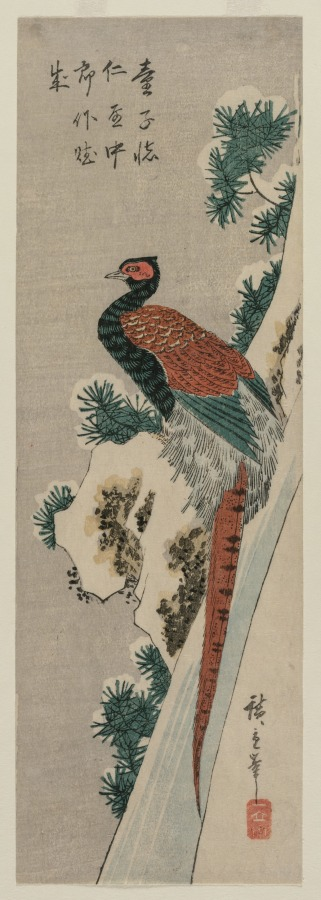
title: Copper Pheasant by Snowy Waterfall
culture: Japan, Edo period (1615–1868)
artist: Utagawa Hiroshige (Japanese, 1797–1858)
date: late 1830s or early 1840s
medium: color woodblock print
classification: Print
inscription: Signature: Hiroshige hitsu Artist Seal: Ichiryusai